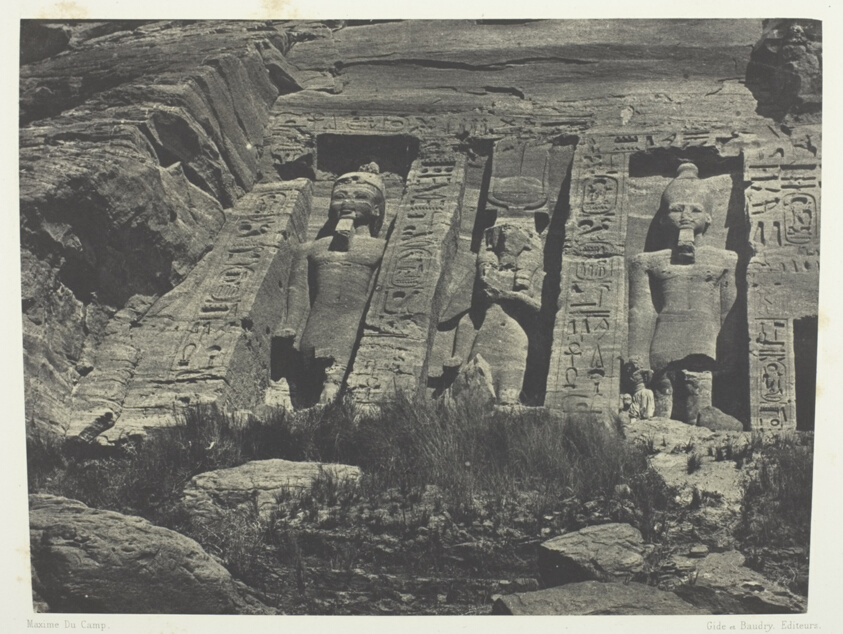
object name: Photograph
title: Ibsamboul, Partie Méridionale Du Spéos D'Hathor; Nubie, plate 110 from the album "Egypte, Nubie, Palestine et Syrie" (1852)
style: 19th century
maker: Maxime Du Camp (French, 1822–1894); printed by the Imprimerie Photographique de Blanquart-Evrard (French, founded 1851)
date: 1849/51, printed 1852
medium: Salted paper print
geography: France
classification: salted paper print; photographic process; photography; photograph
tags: Collected by Hugh Edwards, Egypte, Nubie, Palestine et Syrie